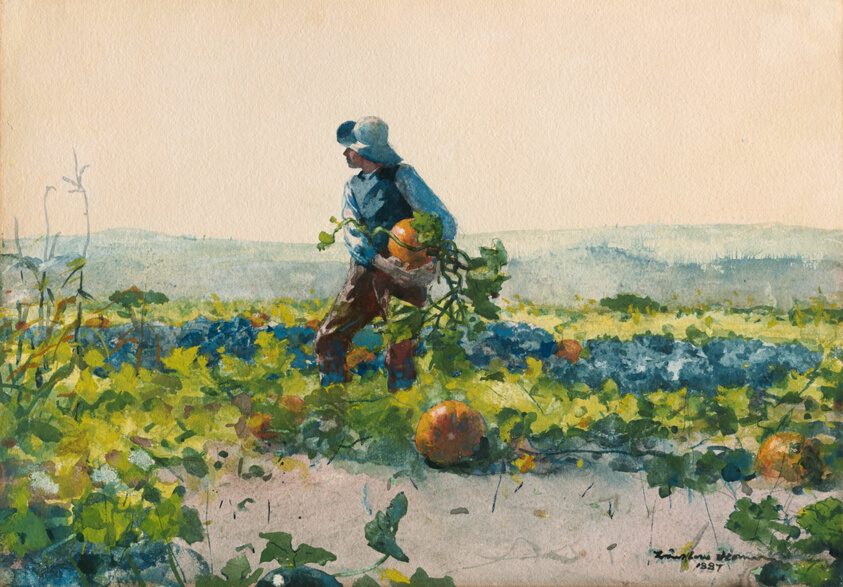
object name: Drawing and Watercolor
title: For to Be a Farmer's Boy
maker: Winslow Homer (American, 1836-1910)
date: 1887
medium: Transparent and opaque watercolor, with rewetting, blotting, and scraping, heightened with gum glaze, over graphite, on thick, rough-textured ivory wove paper (lower edge trimmed)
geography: United States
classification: watercolor; drawings (visual works); prints and drawing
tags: labor, work, children, farm life, people